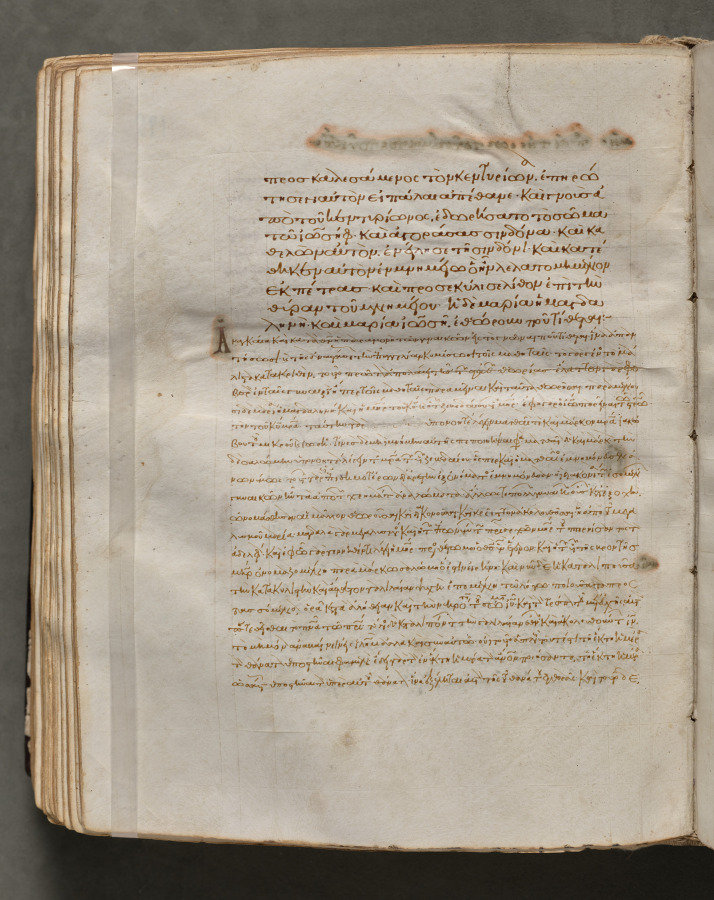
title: Text, folio 195 (verso), from a Gospel Book with Commentaries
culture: Byzantium, Constantinople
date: c. 1000–1100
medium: ink, tempera, and gold on vellum; leather binding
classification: Bound Volume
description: Each of the four gospels in this book opens on a page with brilliantly illuminated borders depicting the author of the text as well as birds-principally peacocks, symbols of the immortality of the soul-and fountains, representing the fountain of life and the salvation of the soul. This volume consists of 428 leaves with texts in Greek. Its level of sophistication suggests that it was probably written and decorated in a monastery in Constantinople.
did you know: Gospel Books were carried in procession through Byzantine churches.